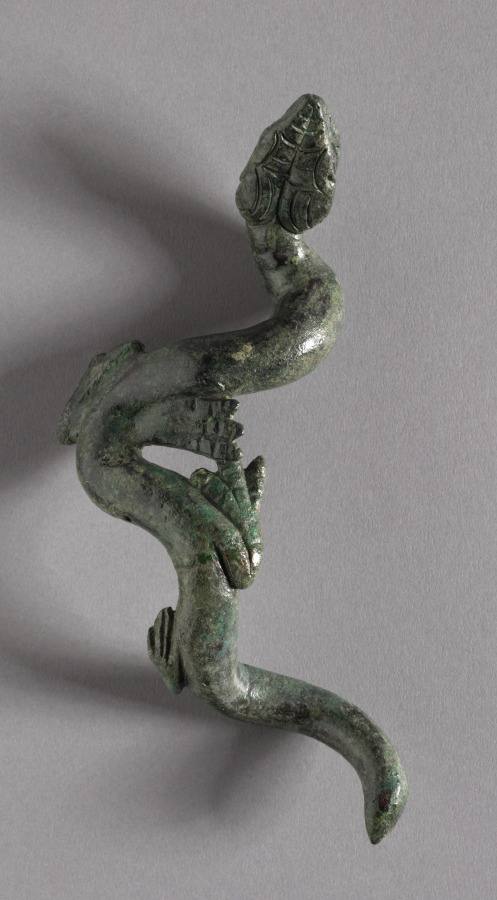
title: Detached Creature from the Cleveland Apollo: Apollo Sauroktonos (Lizard-Slayer) or Apollo the Python-Slayer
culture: Greece, Athens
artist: attributed to Praxiteles (Greek, Athenian, c. 400–330 BCE)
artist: or Follower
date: c. 350–200 BCE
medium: bronze, copper and stone inlay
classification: Sculpture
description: Both snakelike and lizardlike in appearance, the creature has a scaly head and four small feet. These are attached asymmetrically to its long and sinuous body, some with carefully delineated toes, others less detailed. The smallest foot falls behind a line bisecting the creature, where radiography shows a pin joining two separately cast sections. Although the bronze of the front and back halves is quite similar, the front half shows greater porosity (air bubbles). Perhaps the original back half was damaged during casting, necessitating a new or re-casting of that portion of the creature, with a smaller, relocated fourth leg.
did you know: Despite its small size, the creature was cast in two solid parts.